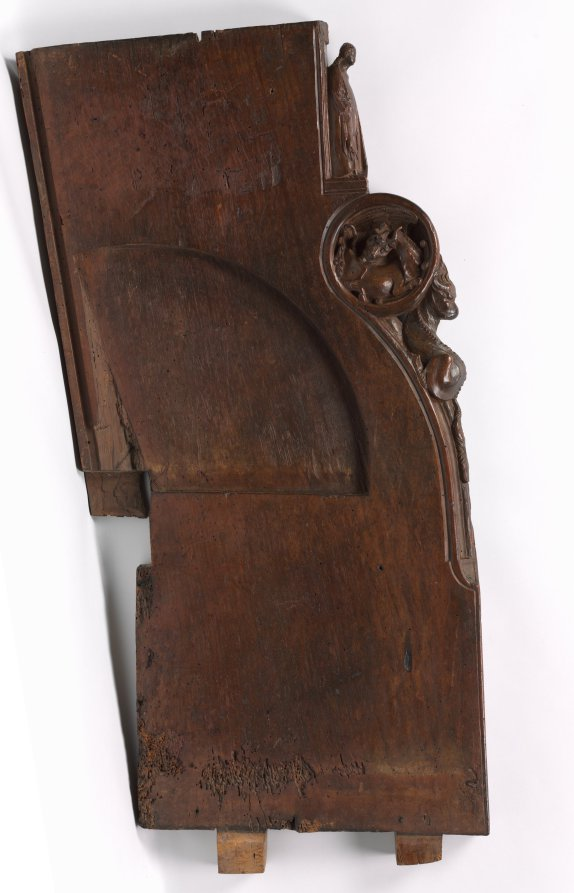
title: Panel from a Choir Stall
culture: Spain, Catalonia, Monastery of Pedralbes, 14th century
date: c. 1330–1340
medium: walnut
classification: Furniture and woodwork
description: The smaller panel here originated from an interior portion of a choir stall. The panel depicts a female figure in a long gown standing on a plinth above two of the apocalyptic beasts, the winged lion of Saint Mark and the winged ox of Saint Luke, which are supported by a wyvern (a heraldic winged dragon).